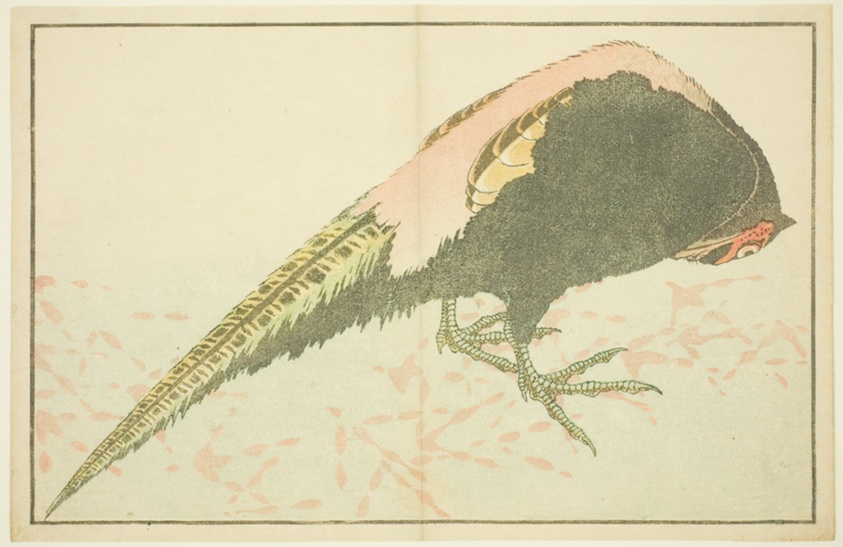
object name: Print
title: Male Pheasant, from The Picture Book of Realistic Paintings of Hokusai (Hokusai shashin gafu)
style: Japanese (culture or style)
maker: Katsushika Hokusai 葛飾 北斎; Japanese, 1760-1849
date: c. 1814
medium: Color woodblock print (album sheet)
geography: Japan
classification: woodblock print; print; asian art